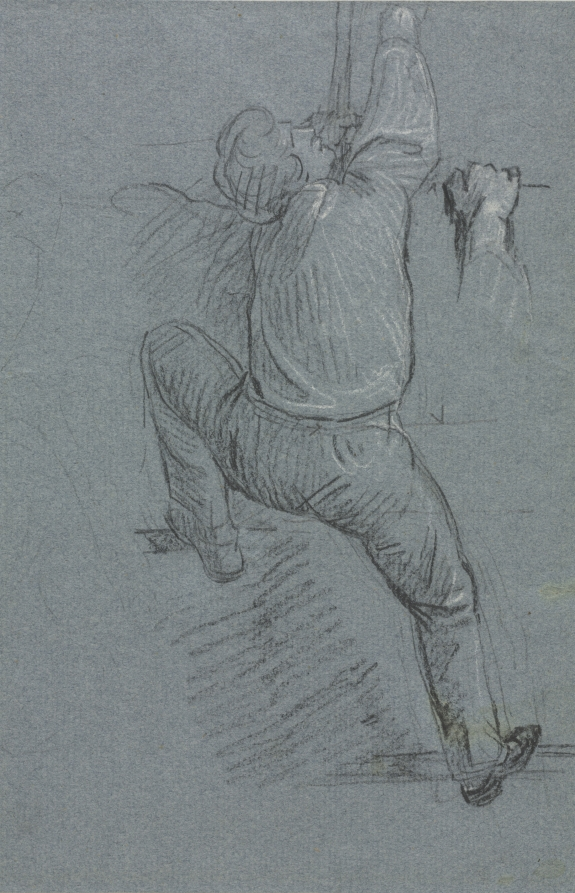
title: Study for The Siege of Gibraltar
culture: America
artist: John Singleton Copley (American, 1738–1815)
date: c. 1785–86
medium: charcoal and pencil heightened with white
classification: Drawing